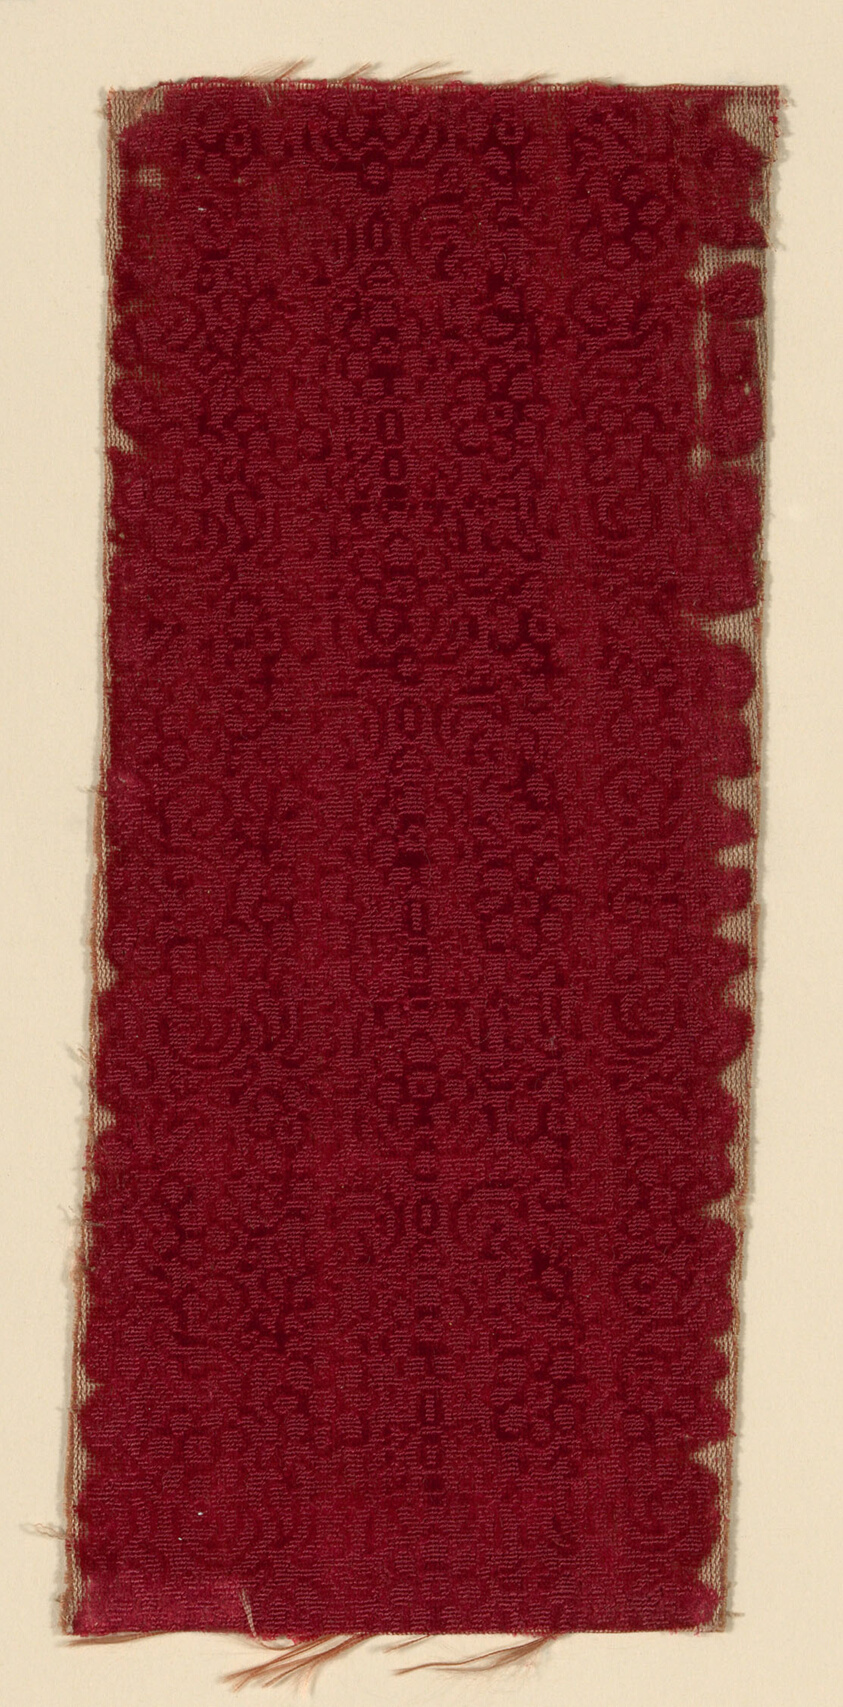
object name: Textile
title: Fragment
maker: Italy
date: 17th century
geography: Italy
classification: textile; weaving - velvet; weaving